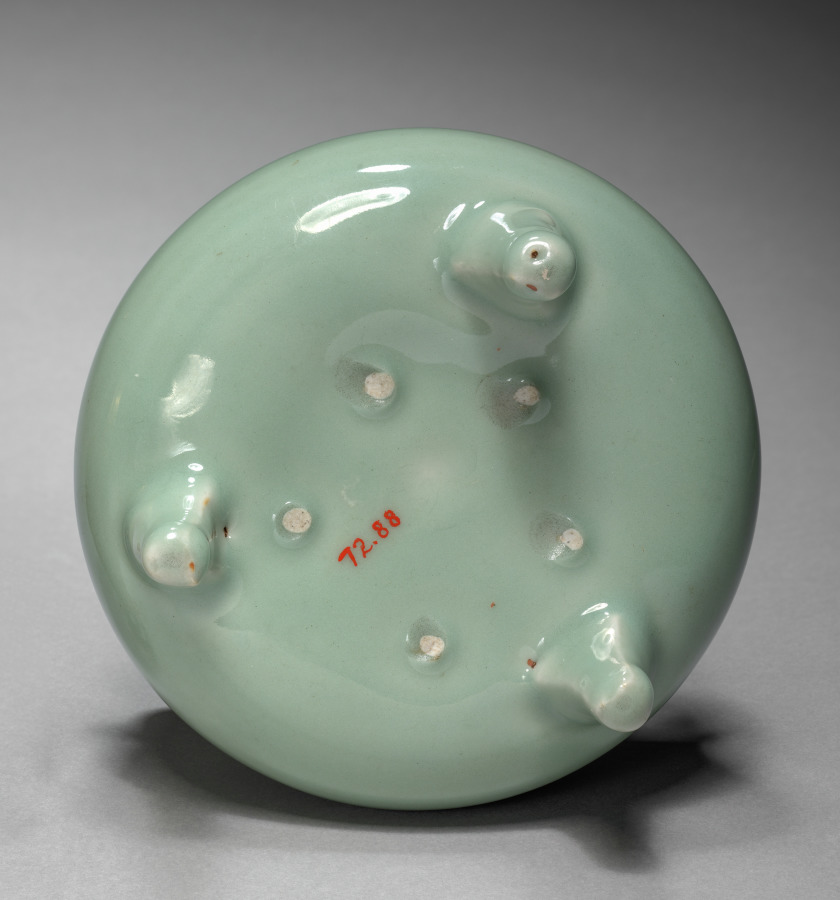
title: Incense Burner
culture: Japan, Meiji period (1868–1912)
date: late 1800s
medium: Porcelain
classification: Ceramic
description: This incense burner emulates Chinese porcelain in its glaze and form. A number of prominent Meiji-period ceramicists explored classical Chinese forms and glazes even as they also produced stoneware with Japanese-style glazes.